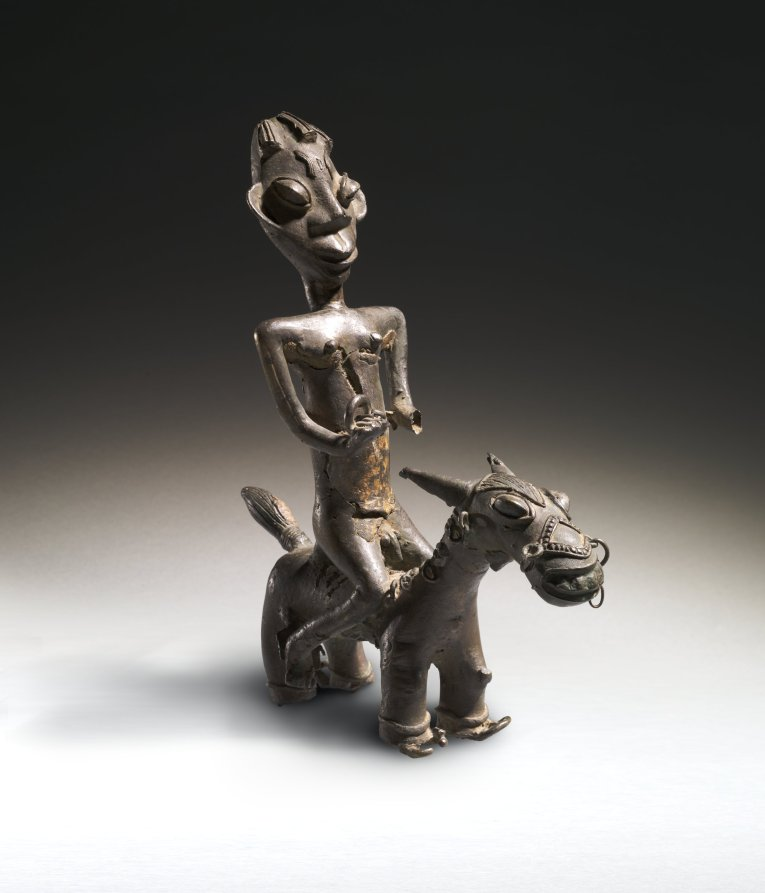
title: Altar figure (onílé)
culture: Africa, West Africa, Nigeria, Yorùbá-style maker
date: possibly 1700s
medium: Copper alloy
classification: Sculpture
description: This figure of a horse and rider is related to the Ògbóni society, whose responsibilities include the burial of titleholders and leaders and the judgment and punishment of criminals. A counterweight to the authority of the king, it is also responsible for the selection, installation, and removal of rulers. Probably once forming a pair with a female figure, the equestrian symbolized the king’s male ancestors.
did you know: Images of horses and riders cast in copper alloy are rare among Yoruba sculptures.